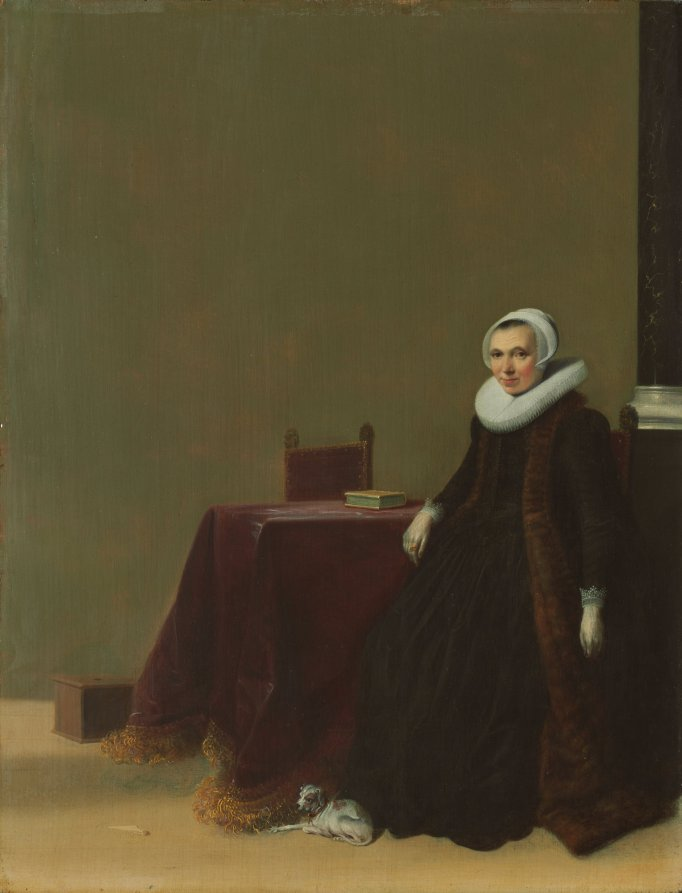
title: Portrait of a Woman with a Dog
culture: Netherlands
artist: Hendrik Gerritsz. Pot (Dutch, c. 1585–1657)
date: c. 1635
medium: oil on wood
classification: Painting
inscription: A painted dark oval appears on the reverse of the panel with the words "Galerie de San Donato," in light red paint. Another inscription can be seen (especially with IR) underneath the logo: "ripristinato da, Mno Luperini, nel 1875" (restored by Mr. Luperini in 1875).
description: The unidentified sitter wears rich black fabric and a brown fur stole, a sheer white linen cap covers her head, an elaborate starched ruff rings her neck, her sleeves finish in punto in aria lace, and a prominent gold ring with a jewel appears on her right hand. The composition, weighted heavily to the right, implies a pendant portrait, yet to identified, probably depicting her husband.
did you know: The wooden box on the floor would have held a dish of glowing coals: an early space heater!